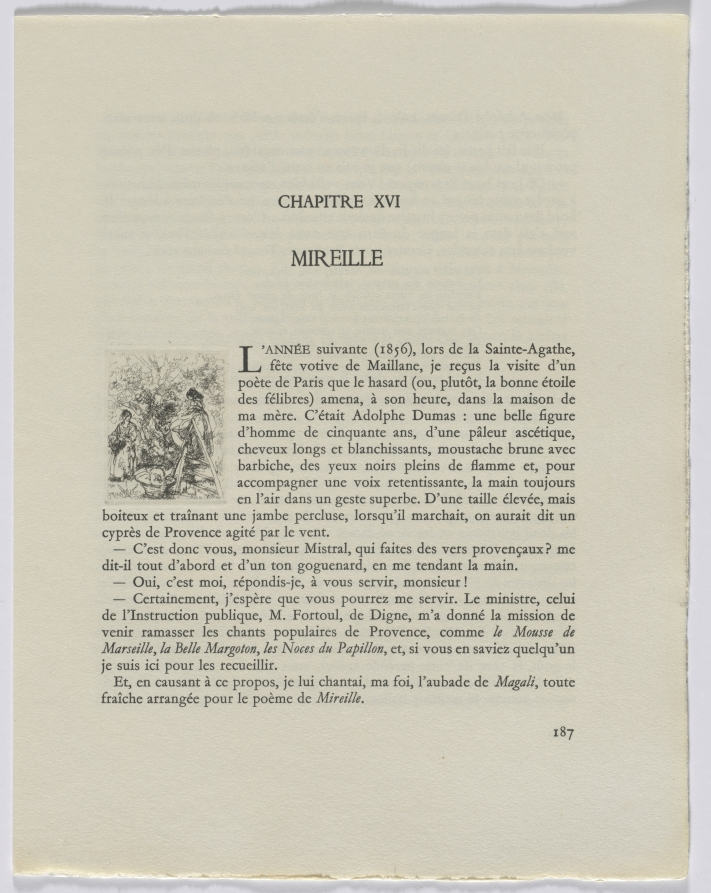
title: Frédéric Mistral: Mémoires et Recits by Frédéric Mistral: figures outside (page 187)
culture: France, 20th century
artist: Auguste Brouet (French, 1872–1941)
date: 1937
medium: etchings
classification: Portfolio